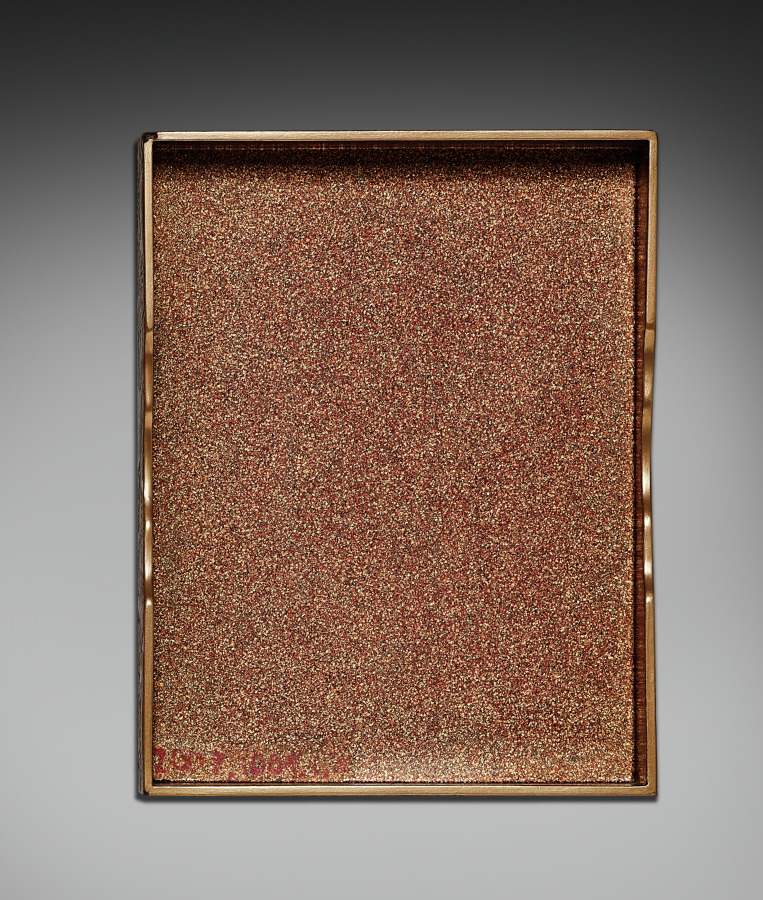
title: Nested Boxes with Chrysanthemums (outer box lid)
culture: Japan, Meiji period (1868–1912)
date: early 1900s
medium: lacquer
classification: Lacquer